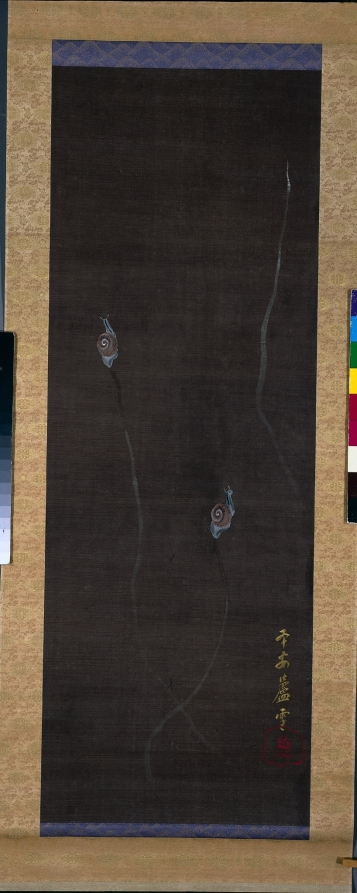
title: Snails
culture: Japan, Edo period (1615–1868)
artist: Nagasawa Rosetsu (Japanese, 1754–1799)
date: c. 1788–89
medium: Hanging scroll; ink, color, and metallic pigments on paper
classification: Painting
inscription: Inscription: 平安蘆雪; Inscription transliteration: Heian Rosetsu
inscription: Sealed: 魚; Seal transliteration: Gyo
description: In this work, Nagasawa Rosetsu carefully described two snails in a manner known as “earth painting” (doro-e), building up colors mixed with crushed white shells in emulation of the thick brushstrokes of oil paint seen in European painting. A silvery metallic pigment indicates the snails’ trails, glistening along an earthen wall. Notably, one trail has no snail, leaving the viewer to guess why.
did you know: Rosetsu was an independent painter active in Kyoto, Japan's cultural capital, known for his visual wit and superb range of technical skills.